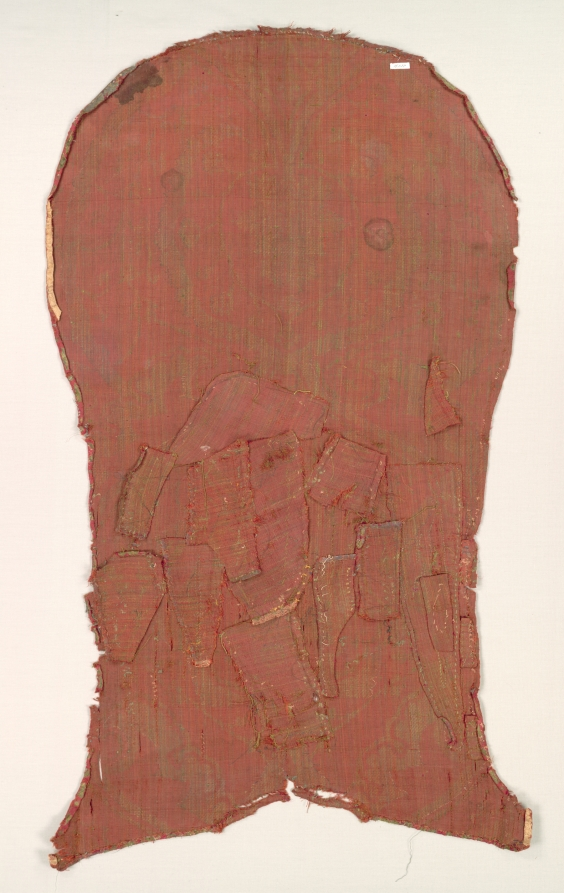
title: Chasuble Front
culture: Turkey, 16th century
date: 16th century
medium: velvet; silk and metallic thread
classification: Velvet